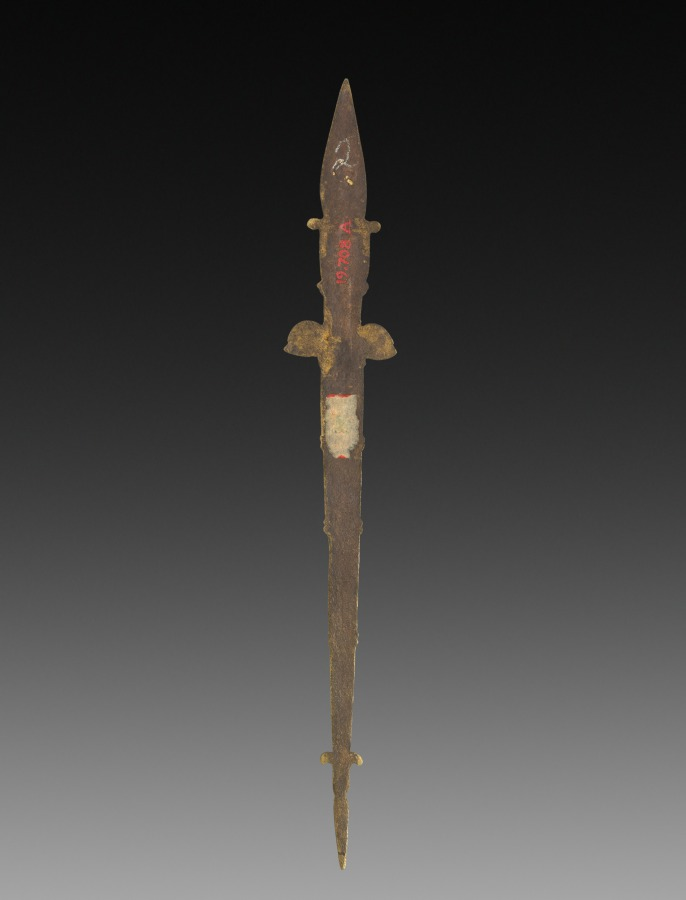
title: Ornamental Detail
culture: France, 18th century, Period of Louis XVI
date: 1775–1799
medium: gilt bronze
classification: Metalwork